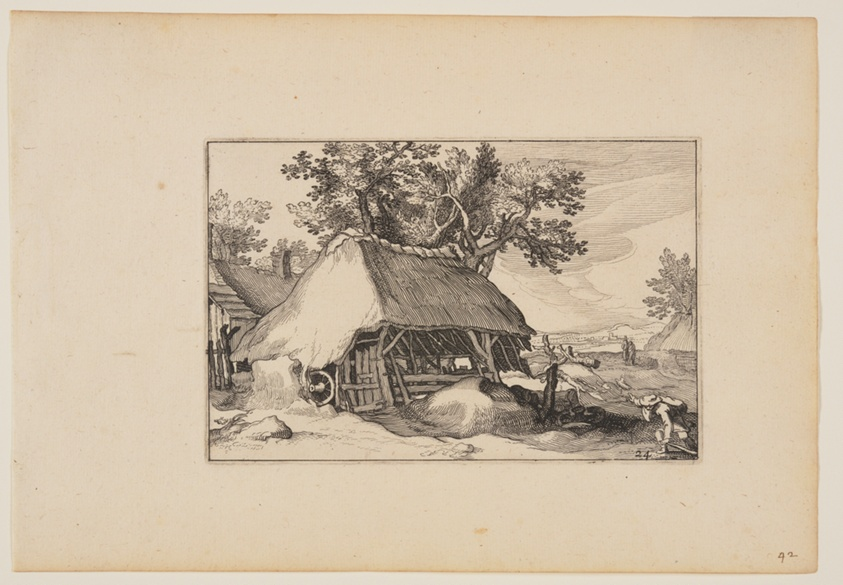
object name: Print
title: A Barn, from Landscapes (Verscheyden aerdige Lanthuysen...)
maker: Claes Jansz. Visscher (Netherlandish, c. 1550–c. 1612); after Abraham Bloemaert (Dutch, 1566–1651)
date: 1620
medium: Etching on ivory laid paper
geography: Netherlands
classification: print; paper; prints and drawing; etching